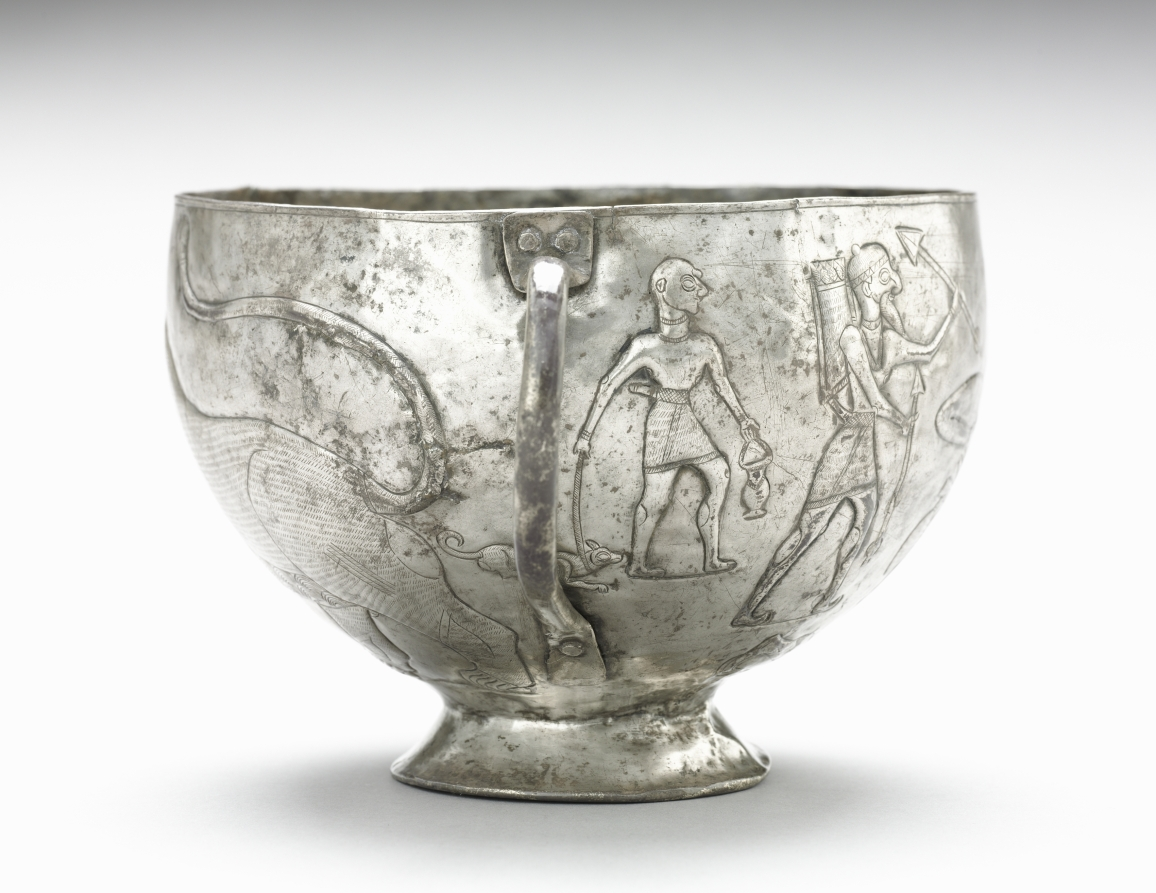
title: Lion Hunting Cup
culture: Iran, Amlash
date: 1100–1000 BCE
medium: silver, raised, chased, repoussé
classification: Metalwork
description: The nomadic gold- and silversmiths of Marlik and Amlash were the first masters of precious metalwork in Iran. Their successors were the bronze workers of Luristan and the silversmiths of the Achaemenian and Sasanian empires.